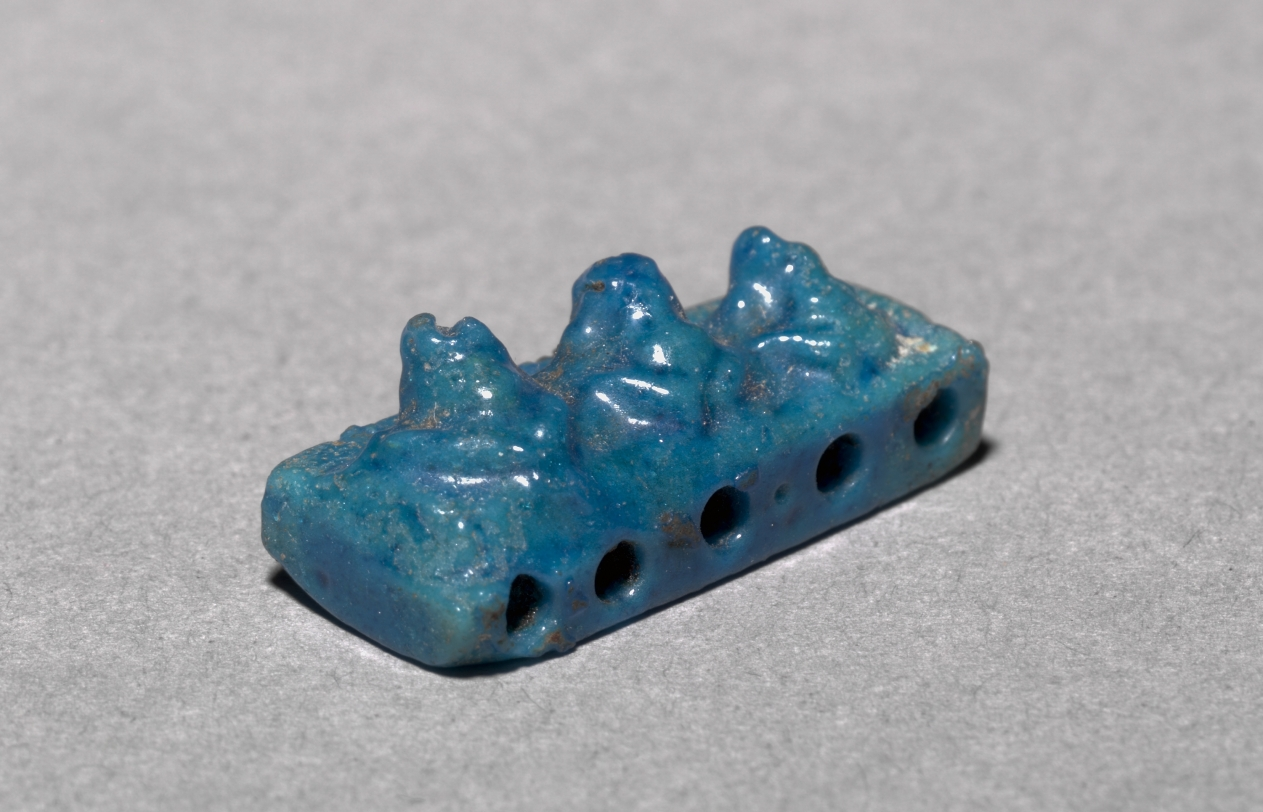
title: Three-Frog Bead Amulet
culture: Egypt, New Kingdom (1540–1069 BCE)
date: 1540–1069 BCE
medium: deep turquoise faience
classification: Amulets